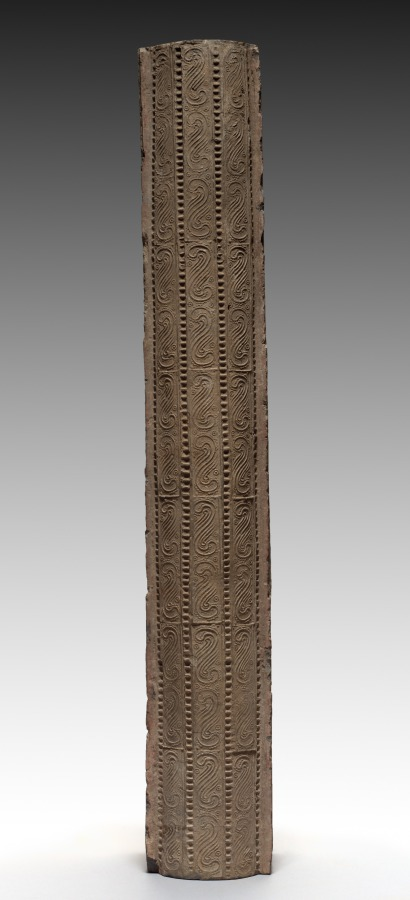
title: Hollow Tile: Lintel from Tomb-Chamber Doorway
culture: China, Han dynasty (202 BCE–220 CE)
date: 100–200 CE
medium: earthenware, die-stamped relief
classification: Ceramic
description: Striding tigers (top), racing horsemen (right column), and reverent officials (left column) are stamped into the surface of this underground portal to a tomb. The doorway preserves in stone the post-and-lintel structure, a basic element of Chinese wooden architecture. By the first century CE, a revolution in Chinese tomb construction and furnishing had taken place. Tombs lined with decorated bricks and tiles replace the earlier tombs constructed with only rammed-earth walls. Ceramic surrogates or models of stoves, houses, servants, and pets filled these more durable chambers, symbolically extending the creature comforts of this world into the world after death.